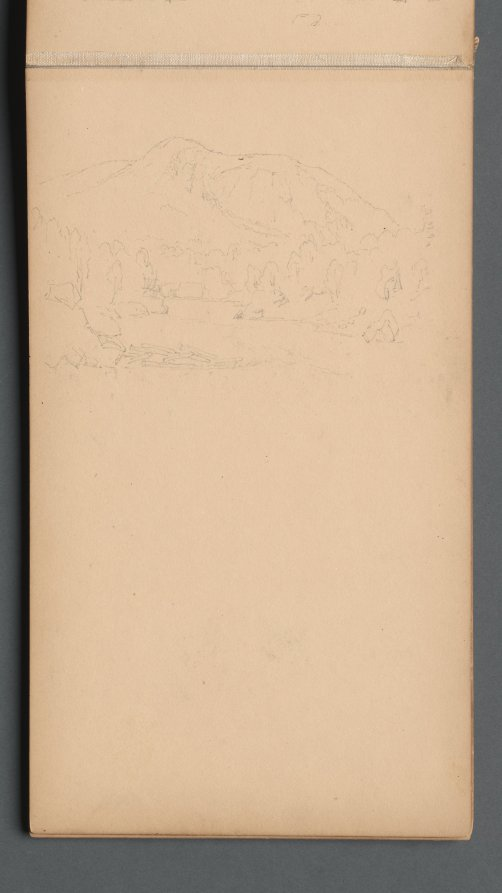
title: Sketchbook, page 08: Carter Mountian (?)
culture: America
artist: Sanford Robinson Gifford (American, 1823–1880)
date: 1859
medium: graphite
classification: Bound Volume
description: Gifford was an American landscape painter belonging to the second generation of Hudson River school artists. Based in New York City with a studio at the Tenth Street Studio Building, Gifford took annual summer trips to the Catskills, the Adirondacks, and other scenic locations in New England. This sketchbook accompanied the artist on his expedition in 1859 to New Hampshire and Maine, where he drew sites such as Dixville Notch, the White Mountains, and Peaks Island, Casco Bay. Gifford used such graphite studies as the basis for oil paintings worked up in his studio, such as A Home in the Wilderness (1866).